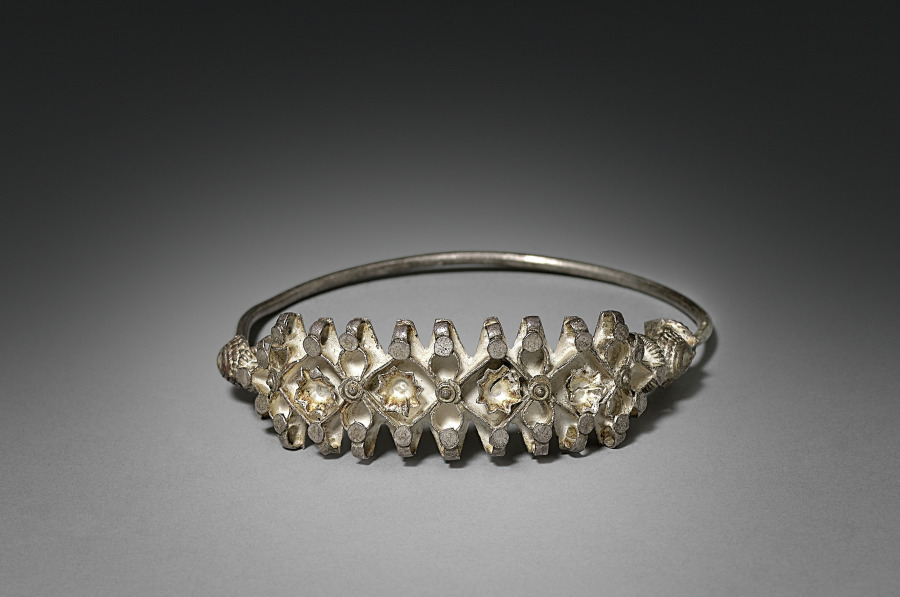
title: Nose Ring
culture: India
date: early 1900s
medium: silver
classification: Jewelry